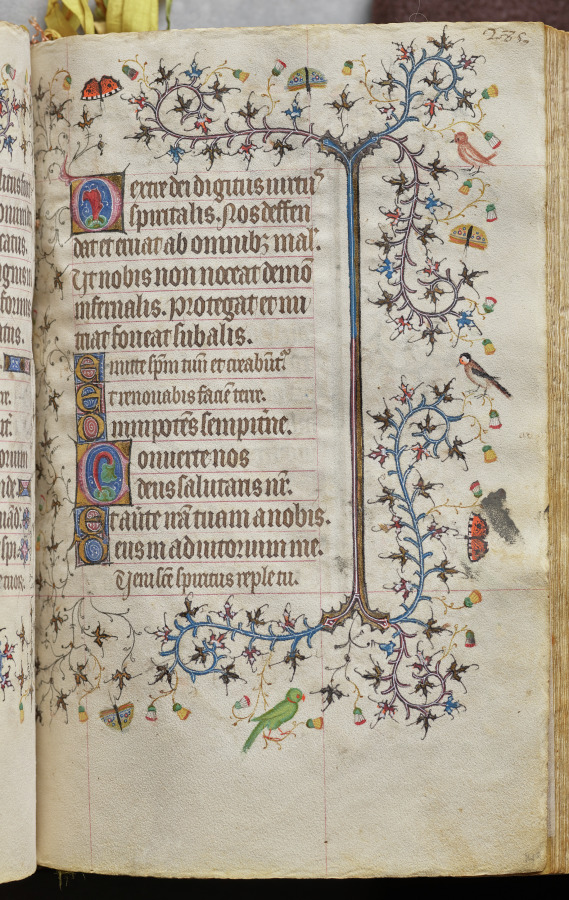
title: Hours of Charles the Noble, King of Navarre (1361-1425): fol. 143r, Text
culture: France, Paris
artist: Master of the Brussels Initials and Associates (French)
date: c. 1405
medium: ink, tempera, and gold on vellum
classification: Bound Volume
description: This precious volume was obviously highly prized by its owner, the French-born King of Navarre, who had his coat of arms painted on no less than twenty folios. Rather than directly commissioning this manuscript from a specific workshop, it seems that Charles the Noble acquired his book of hours -- perhaps ready-made for the luxury market -- while on a trip to Paris in 1404-05. A collaborative effort, six painting styles are evidenced within the pages of this codex, those of two Italians, two Frenchmen, and two Netherlanders. The painter who was responsible for the planning and decoration of the book, and who produced seventeen of the large miniatures, was a Bolognese artist known as the Master of the Brussels Initials. His principal assistant, responsible for most of the borders, was a Florentine who signed his name "Zecho" da Firenze on folio 208 verso.